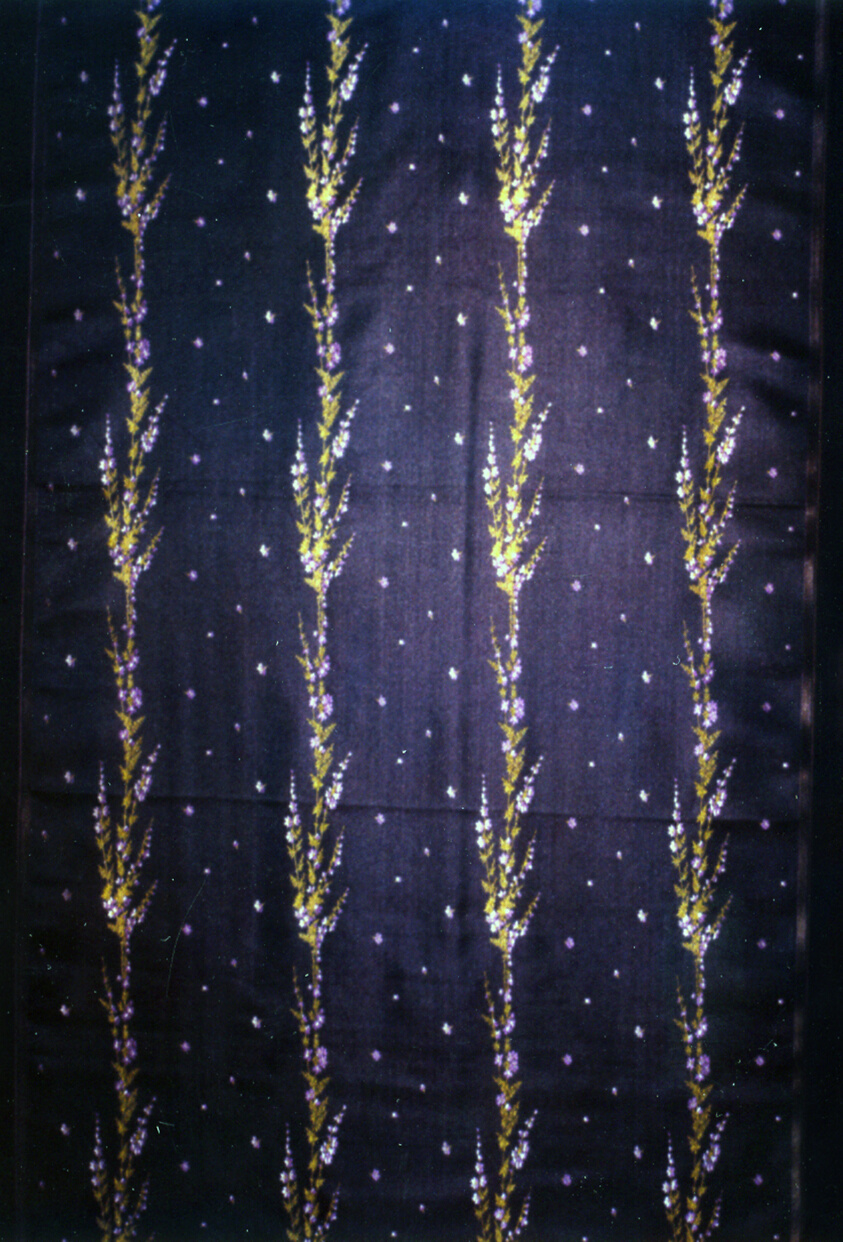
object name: Textile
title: Panel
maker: France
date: Late 19th century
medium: Silk, satin weave with patterning wefts and self-patterned by ground weft floats; woven on a loom with Jacquard attachment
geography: France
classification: textile; weaving